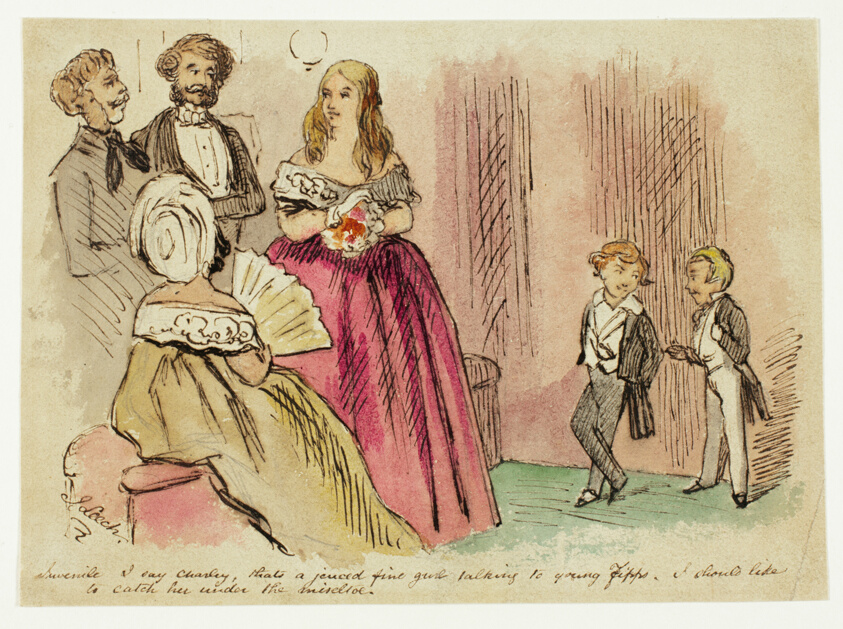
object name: Drawing and Watercolor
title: Juvenile: I say Charley, that's a jeuced fine girl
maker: John Leech (English, 1817-1864)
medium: Watercolor and pen and brown ink, over graphite, on cream wove paper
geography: England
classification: watercolor; drawings (visual works); prints and drawing